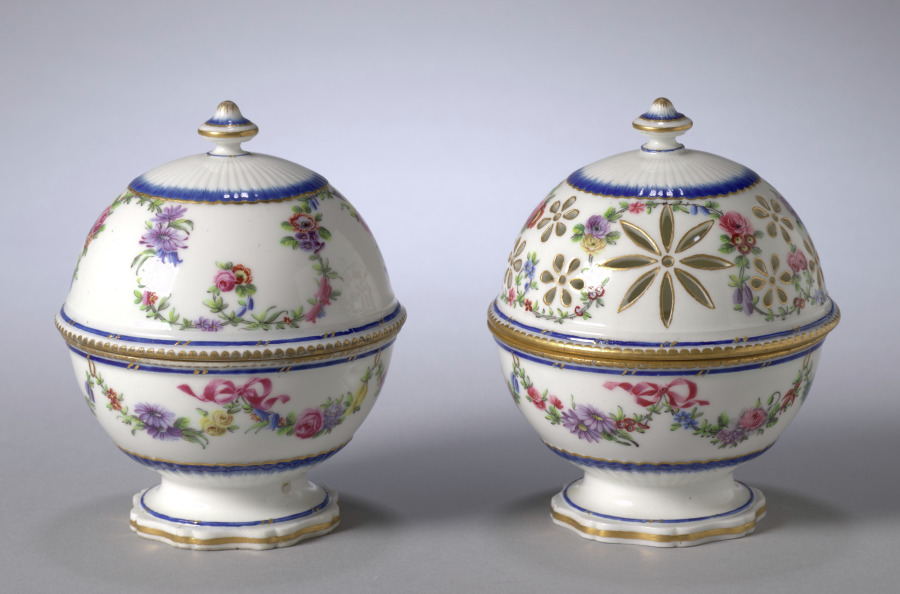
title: Soap Box and Sponge Box Set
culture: France, Sèvres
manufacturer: Sèvres Porcelain Factory (French, est. 1756)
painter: Antoine-Toussaint Cornaille (French, 1735–1812)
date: 1769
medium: soft-paste porcelain with enamel and gilt decoration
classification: Ceramic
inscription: [Interlaced 'L's below three dots in a line with the date letter 'Q' (1953.635.2)]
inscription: [Painter's mark of Antoine-Toussaint Cornaille(s), in the form of a crochet or quaver]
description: In 18th-century France the toilette, an elaborate dressing ceremony practiced by both men and women, became increasingly ritualized and public, creating a demand for matching containers and implements like this soap and sponge box. The box with the lid pierced in floral patterns would have been used to carry the sponge.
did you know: The first recorded sale of a boîte d’éponge was to Louis XV in September of 1767.